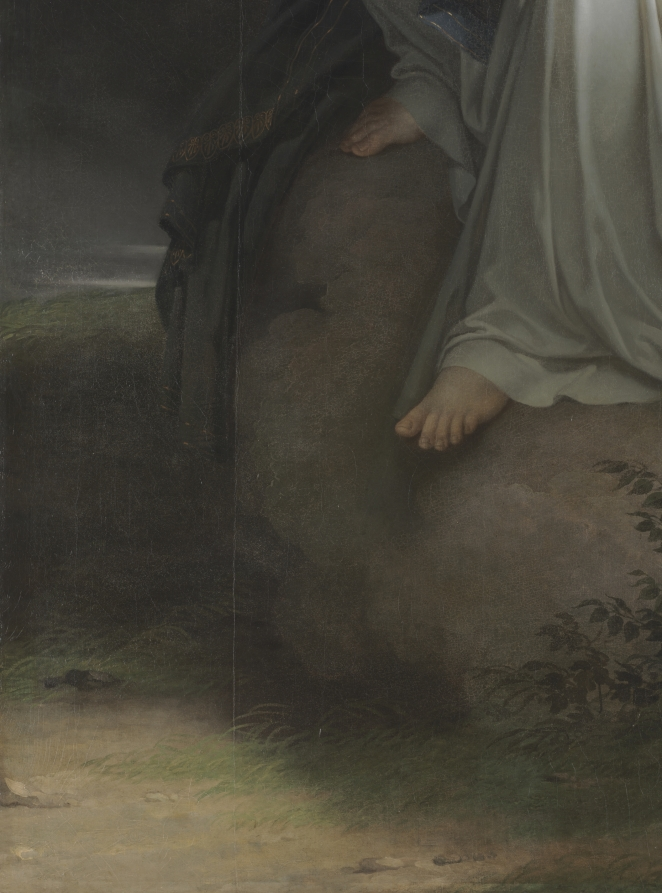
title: Calliope, Muse of Epic Poetry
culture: France, late 18th-early 19th century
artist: Charles Meynier (French, 1768–1832)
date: 1798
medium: oil on canvas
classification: Painting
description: The eldest of the nine Greek muses, Calliope was the goddess of music, song, and dance. She was also known as the goddess of epic poetry and conferred the gift of eloquence on kings and princes. She stands here before a bust of Homer, the ancient Greek poet who wrote the Odyssey and the Iliad. This painting belongs to a cycle of five works commissioned by businessman François Boyer-Fonfréde for his home in Toulouse.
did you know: Through the assistance of his brother, a famous actor of the Comédie Française, Charles Meynier studied in the studio of François André Vincent, the principal rival of the master Jacques-Louis David